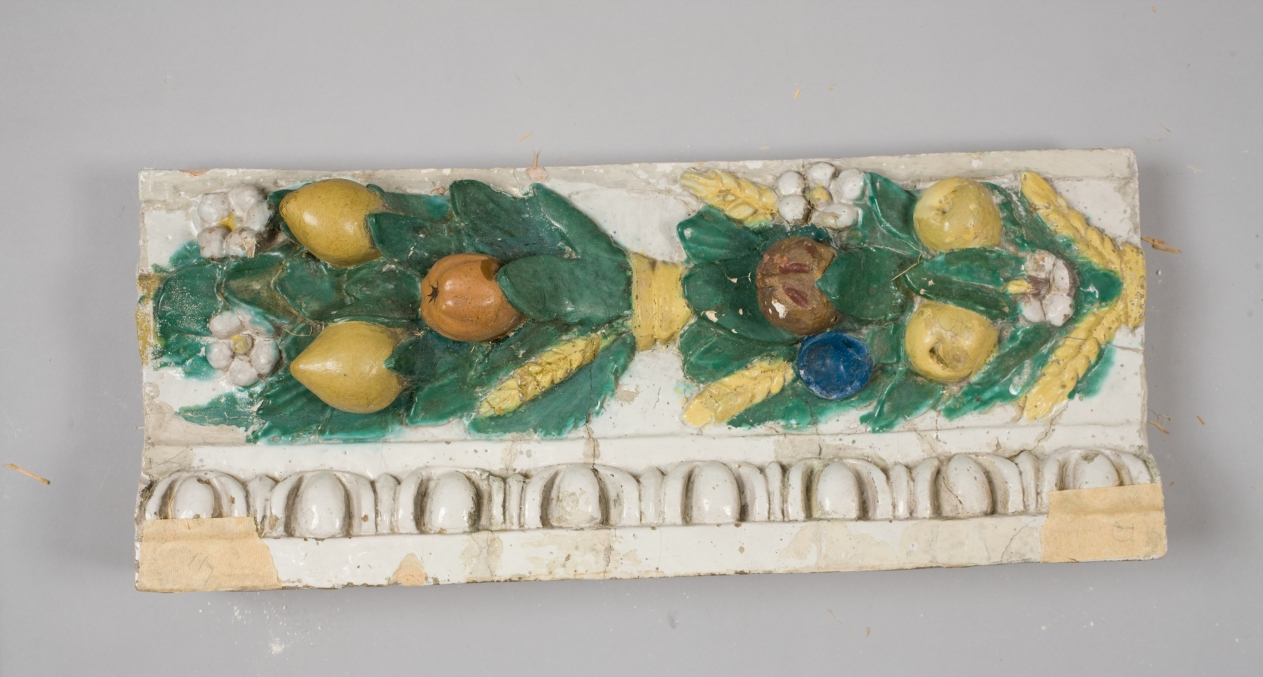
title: Fragment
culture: Italy, Florence, 16th century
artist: Benedetto Buglioni (Italian, 1461–1521)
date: c. 1900–1910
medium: glazed terracotta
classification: Sculpture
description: The Madonna sits upon a throne with the Christ Child standing on her knee. He is steadied by his mother, turning delicately to grasp the Virgin's robe for support. On the left is St. Francis, identified by his stigmata. On the right, St. Anthony Abbot is identified by his monk's robe and T-shaped walking stick. The brown robes of the saints, the purple of the Virgin's tunic (a shade characteristic of the artist), and the flesh tones of the figures contrast strongly against the bright blue background. In the semicircular sky behind the figures, three winged cherub heads emerge, representing a host of angels. The inclusion of St. Francis in this altarpiece honors the saint, suggesting that the altarpiece may have been originally built into the wall of a Franciscan institution in Tuscany. Two shields bearing the Borgherini family crest appear in the lower portion of the altarpiece's border, further suggesting that the chapel for which this altarpiece was made was likely owned or endowed by the family. Glazed terracotta is both durable and decorative and the gleaming white of this piece would have stood out in the darkness of a church. The medium was made popular by Renaissance artist Luca della Robbia and came into fashion as a substitute for expensive carved marble. A rounded arch frame embellished with fruit and flower garlands as well as egg-and-dart and cord moldings accompanied the work when it was acquired, but was later determined not to be original and removed. Buglioni's work bears the influence of the della Robbias, particularly in the simple color scheme. Buglioni likely worked in the studio of Luca's nephew, Andrea, where he would have learned the technique of glazing terracotta.